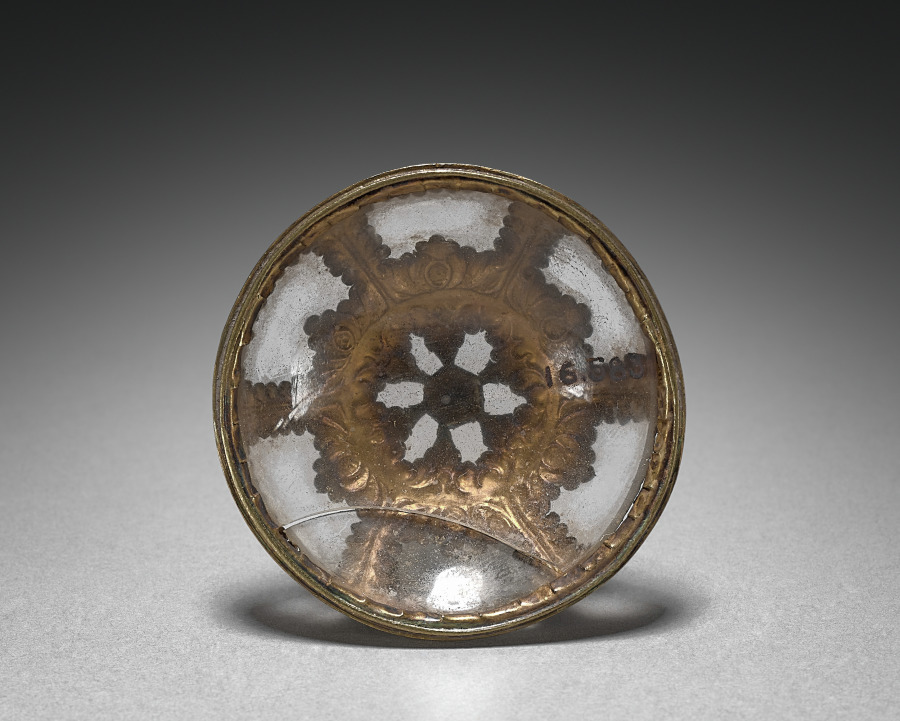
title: Box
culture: Java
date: 20th Century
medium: glass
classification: Glass